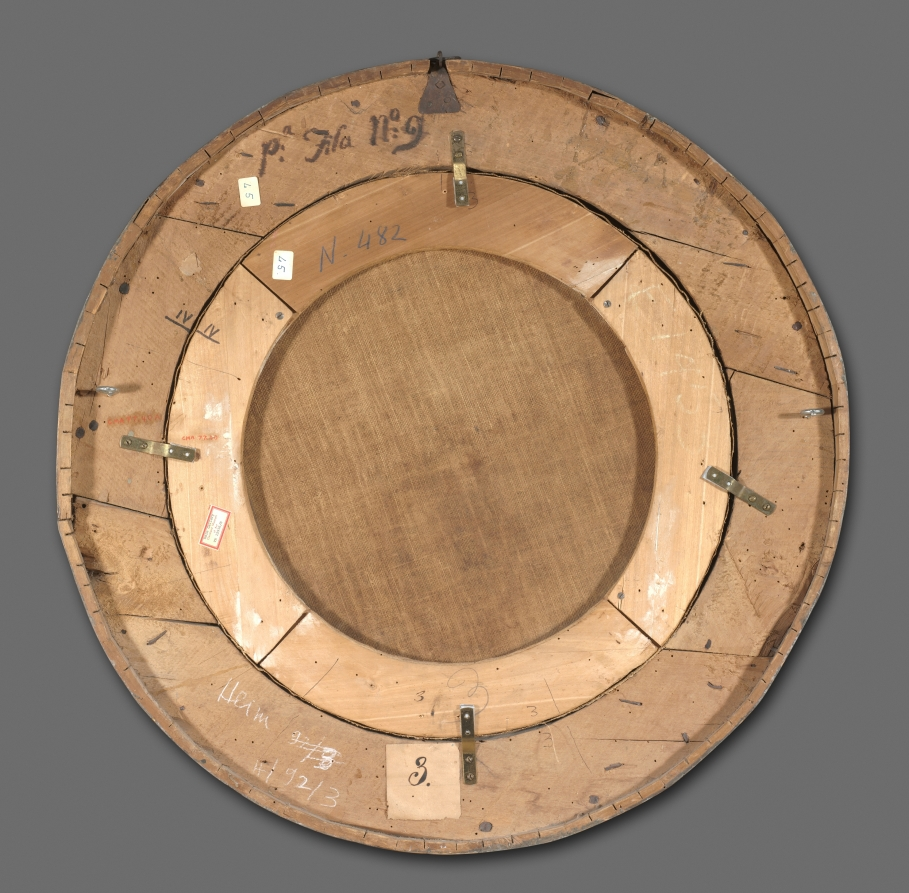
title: Scenes of Witchcraft: Day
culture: Italy, 17th century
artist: Salvator Rosa (Italian, 1615–1673)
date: c. 1645–1649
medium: oil on canvas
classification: Painting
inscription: Signed: "SR [monogram]"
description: Rosa's scene at noon showcases several hoary hags that exemplify his treatment of witches. Clutching skulls, wielding brooms, and slicing lizards, the witches prepare to travel to the Sabbath, an orgy of witches. One witch flays the skin of a thrashing lizard to extract the innards needed to concoct magical unguents, while her companions brandish skulls. Goats were the common mode of transportation for witches, but Rosa substitutes an owl, a harbinger of evil. Although Rosa foregrounds the violent cruelty of witchcraft, situating the grotesque hags in the full light of day introduces a comic aspect to the scene. Rosa's use of comedy and the unexpected to critique the world around him stemmed from the satirical poetry he wrote throughout his stay in Florence and his return to Rome in 1649. By lightening the palette and mood of the painting, Day reflects his interest in satire and his self-appointed role to expose and critique human folly.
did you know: The artist chose the painting's shape to reference the foundational role of the circle in practicing magic.